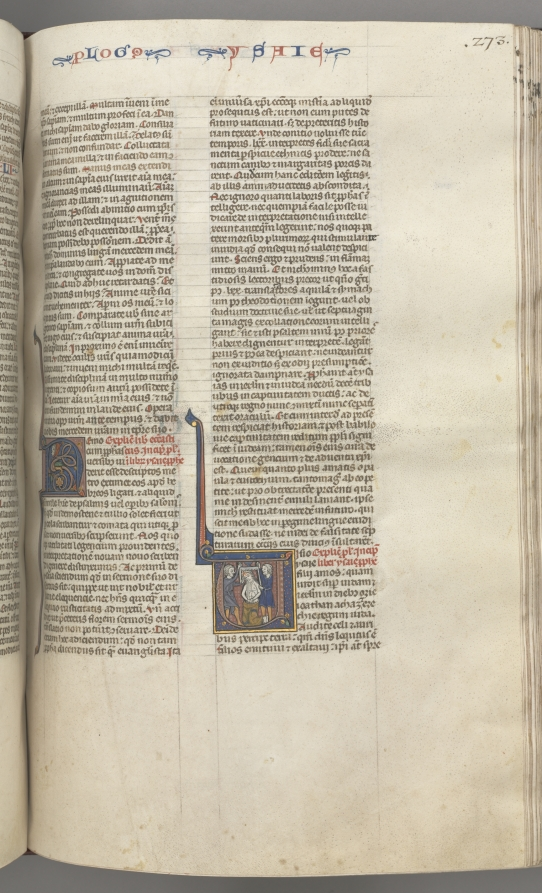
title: Fol. 273r, Isaiah, historiated initial V, the martyrdom of Isaiah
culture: Southern France, Toulouse(?), 13th century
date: c. 1275–1300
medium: ink, tempera and gold on vellum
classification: Bound Volume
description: Biblical manuscripts were highly prized and important possessions of churches, monasteries, cathedral schools, and universities throughout medieval Europe. The biblical texts were known as the vulgate, the translations made by Saint Jerome in the fourth century from Hebrew and Greek into Latin, which became the definitive and official Latin version of the Roman Church. In the 13th century, the bible was, for the first time, produced as a single volume with an officially sanctioned sequence to its books and chapters as illustrated by this example. The very extensive decoration of this bible is arranged hierarchically to indicate the relative importance of the various texts so that full or almost full-page initials mark the openings of the first prologue, Genesis, and the first Gospel; historiated initials mark the beginning of each book and illuminated initials mark the Prologues.